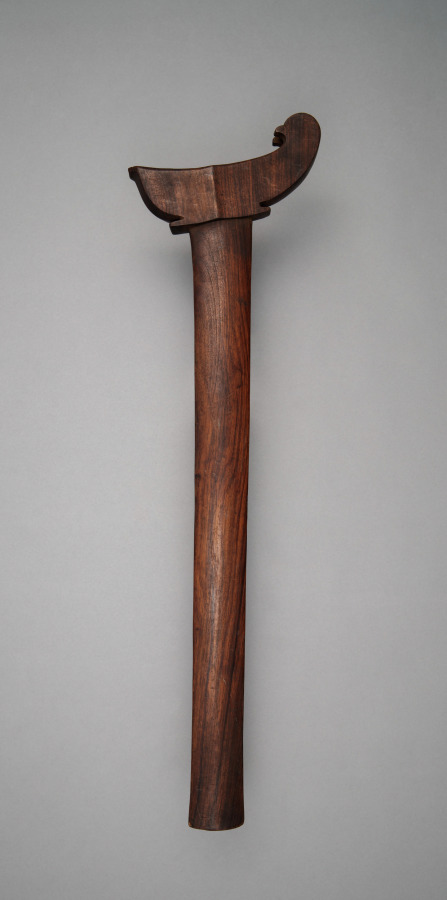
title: Scabbard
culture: Philippines, Mindanao, most likely Sulu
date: before 1916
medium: Wood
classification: Arms and Armor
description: This wooden scabbard is carved from a single piece of hardwood. Its boat-shaped upper section is designed to accommodate the hilt of a kalis (kris) sword. The surface is smooth and undecorated, highlighting the natural grain of the wood.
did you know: Narra wood (sometimes called “Philippine mahogany”) is costly and difficult to carve.